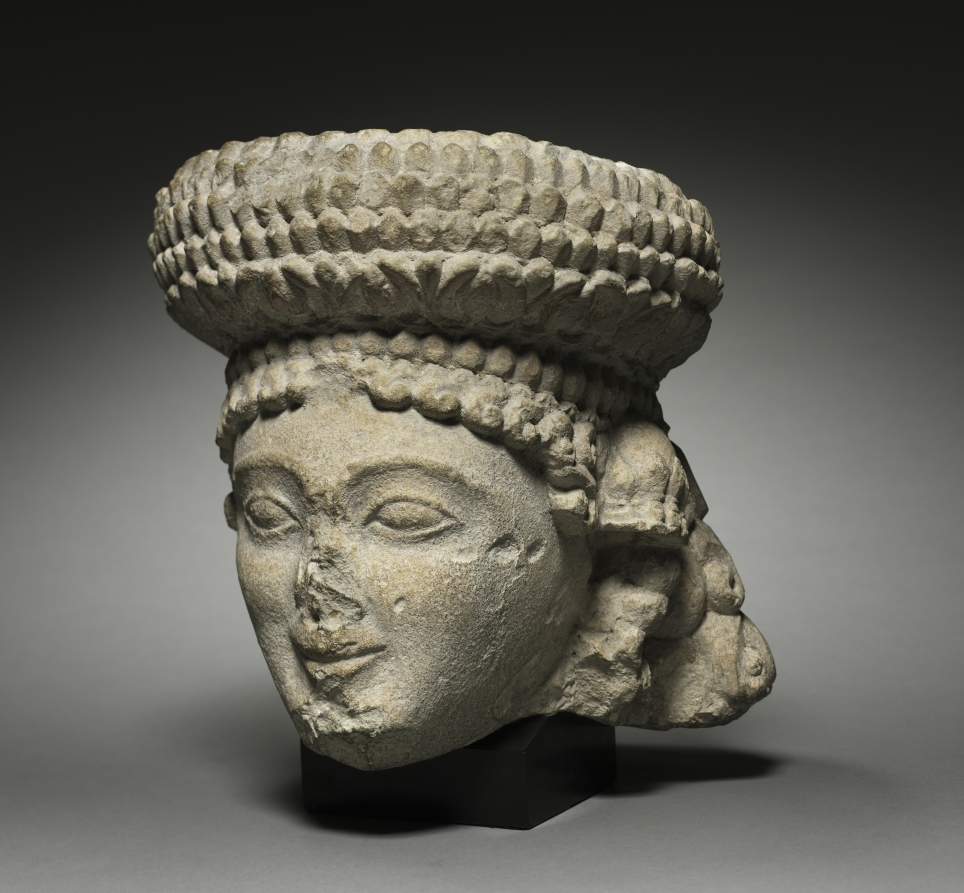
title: Head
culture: Cyprus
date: 500–300 BCE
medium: limestone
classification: Sculpture